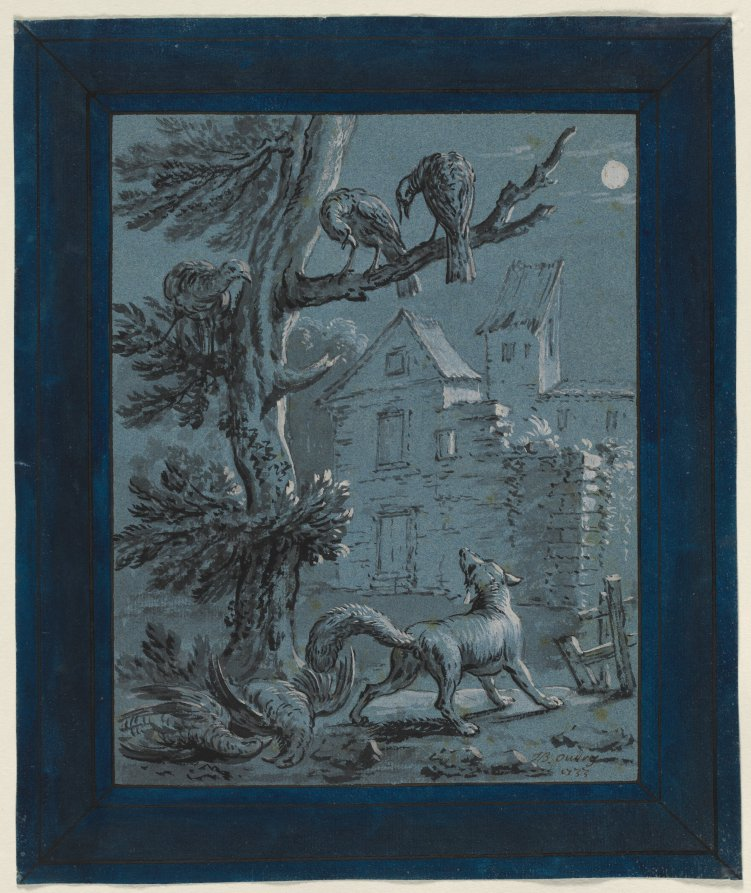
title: The Fox and the Turkey Hens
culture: France, 18th century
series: The Fables of La Fontaine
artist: Jean-Baptiste Oudry (French, 1686–1755)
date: 1733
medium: brush and black ink and gray wash heightened with white gouache, blue ink in margin; framing lines in brown ink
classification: Drawing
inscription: signed, lower right, in brown ink: JB. Oudry / 1733; VERSO, upper center, in brown ink: 103.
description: This drawing depicts a fable about turkeys whose anxieties about falling victim to a fox ultimately make them susceptible to the predator. It was one of 276 designs produced by Jean-Baptiste Oudry related to humorous but educational stories compiled by French poet Jean de La Fontaine in the later 1600s. Published in four luxurious volumes between 1755 and 1759, The Fables of La Fontaine withOudry’s illustrations was one of the most ambitious publishing projects of the artist’s time. The books were art objects meant to be collected more than read, but they were successful enough that they were reissued several times in later centuries.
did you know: The most recent edition of La Fontaine’s Fables illustrated by Oudry was a colored version produced in 2007 by Editions Diane de Selliers.